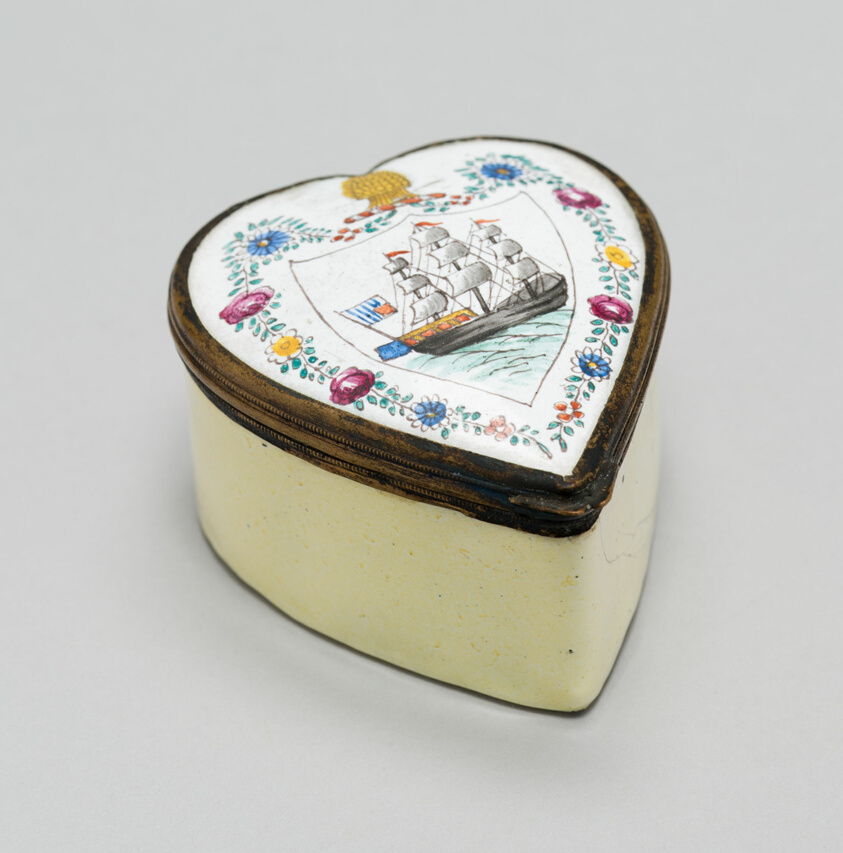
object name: Metalwork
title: Patch Box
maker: Bilston, England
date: c. 1785/1800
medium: Metal and enamel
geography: Bilston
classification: enamel; metalwork